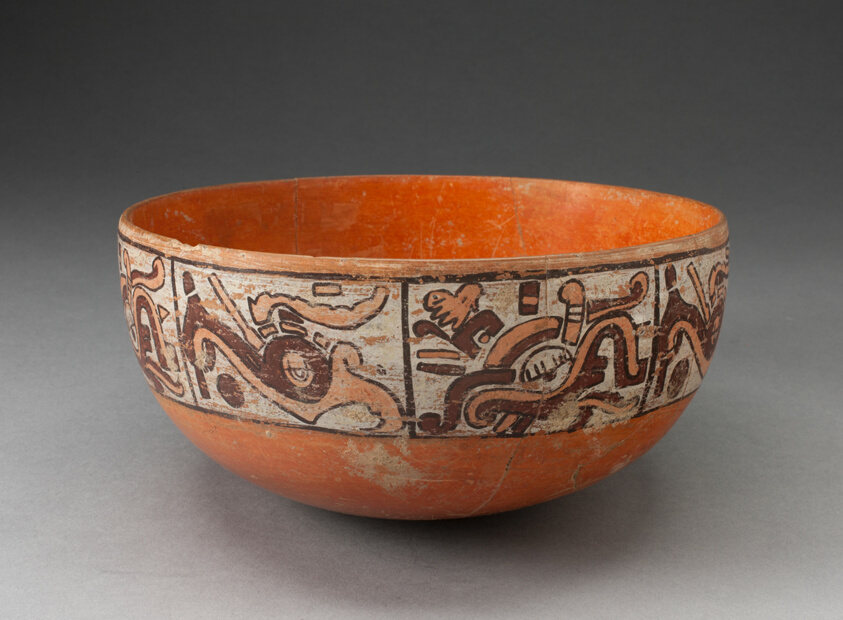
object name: Vessel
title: Polychrome Bowl Depicting Eight Abstract Motifs on Exterior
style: cholula, Arts of the Americas, mesoamerican, mixteca-puebla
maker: Probably Cholula, Mixteca-Puebla style; Puebla, central Mexican highlands, Mexico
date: 1200–1521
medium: Ceramic and pigment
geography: Puebla state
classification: bowl; earthenware; ceramics; vessel; art of the americas